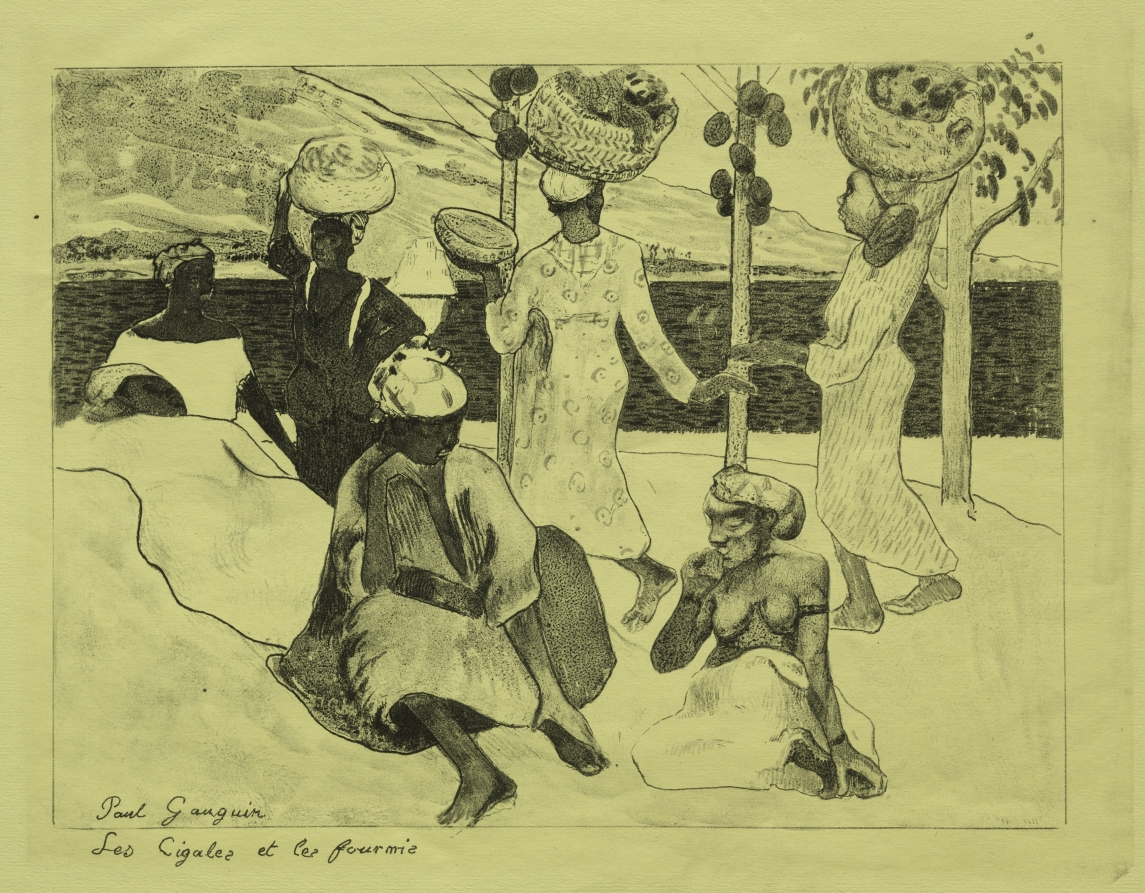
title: Volpini Suite: The Grasshoppers and the Ants (Les Cigales et les Fourmis)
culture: France, 19th century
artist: Paul Gauguin (French, 1848–1903)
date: 1889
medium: zincograph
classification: Print